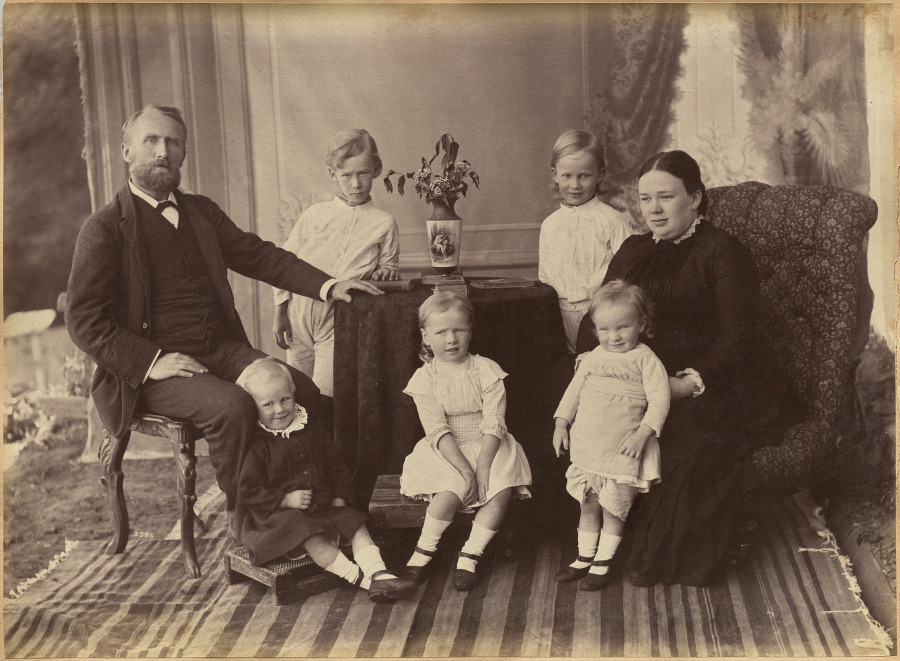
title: Mr. Robert Holtz and family (verso)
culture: India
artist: Raja Deen Dayal (Indian, 1844–1905)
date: c. 1882–87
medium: albumen print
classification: Photograph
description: These photographs are part of an album, now disassembled, of around 105 photographs taken in India between 1885 and summer 1887 that provide glimpses into the lives of the British colonial elite and royal and upper-class Indians. The museum holds another group of 37 pictures from this album (2016.266), which was probably commissioned by a British civil servant visiting or working in India around 1888 as a personal souvenir of his experiences there.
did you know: Raja Deen Dayal is regarded now, and was considered during his lifetime, to be India’s most important 19th-century photographer.